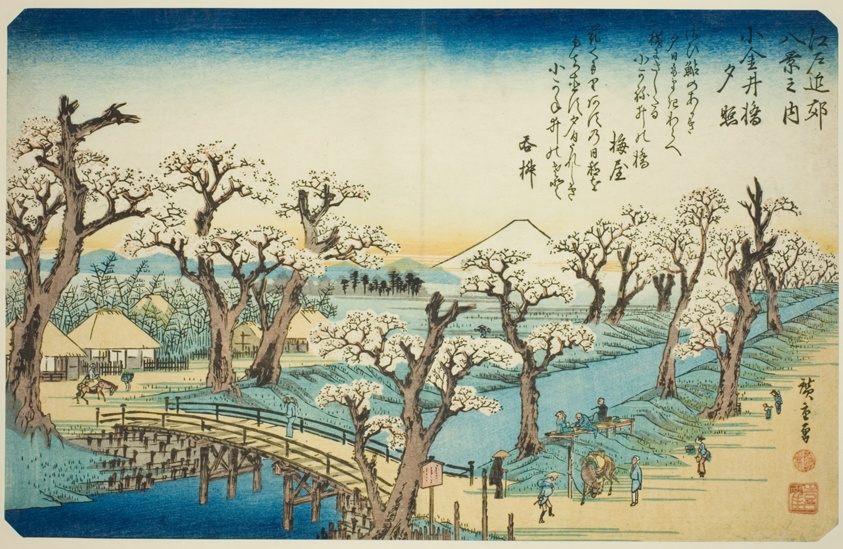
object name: Print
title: Sunset Glow at Koganei Bridge (Koganei-bashi sekisho), from the series "Eight Views in the Environs of Edo (Edo kinko hakkei no uchi)"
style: Japanese (culture or style)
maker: Utagawa Hiroshige 歌川 広重; Japanese, 1797-1858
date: c. 1837/38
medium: Color woodblock print; oban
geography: Japan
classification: woodblock print; print; asian art